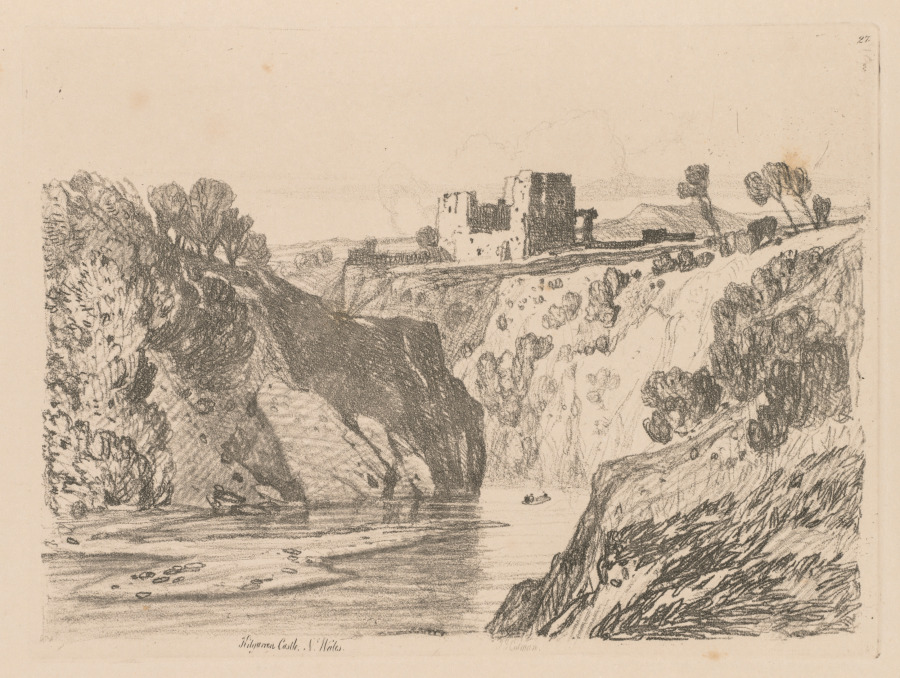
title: Liber Studiorum: Plate 27, Kilgarren Castle, N. Wales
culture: England, 19th century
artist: John Sell Cotman (British, 1782–1842)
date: 1838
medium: softground etching, from a bound volume containing 48 plates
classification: Bound Volume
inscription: In plate, within image, upper right: 27; in plate, below image: Kilgarren Castle, N. Wales. J S Cotman